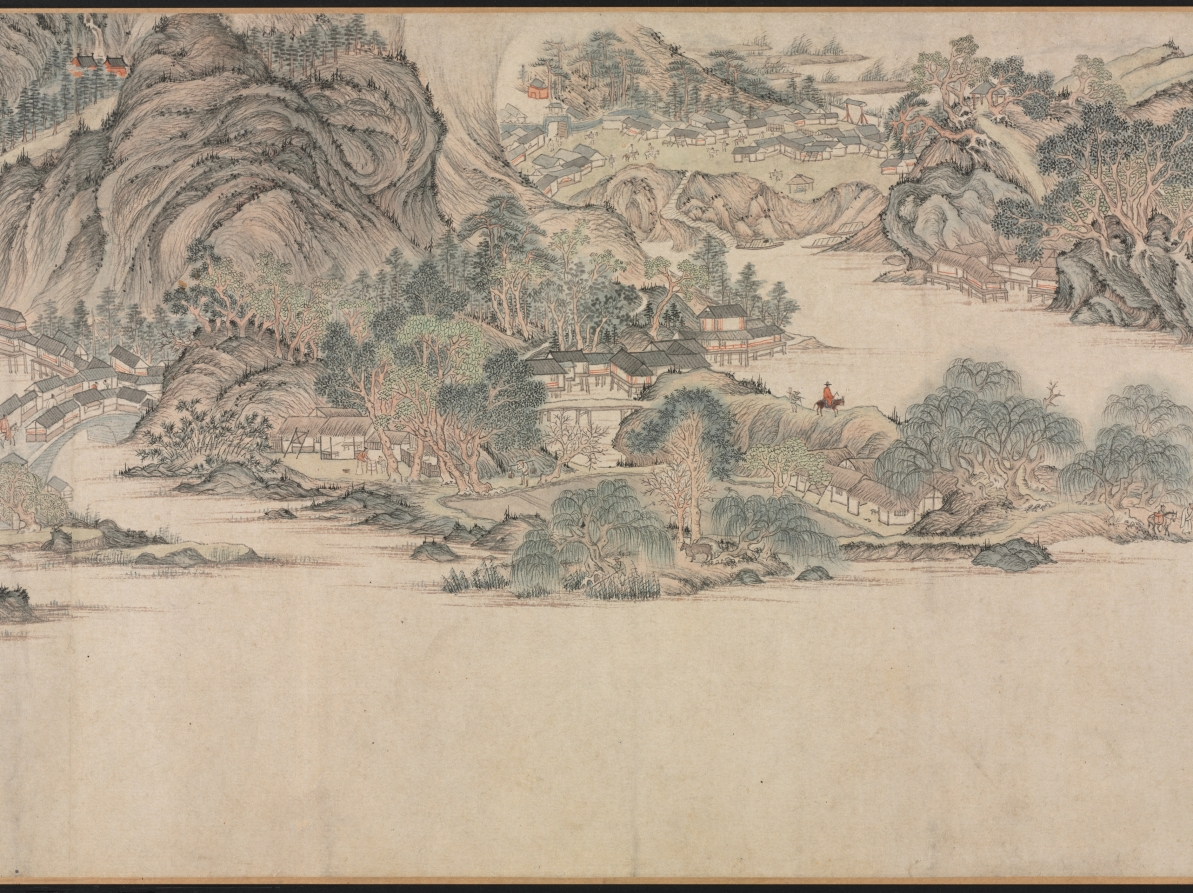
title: Greeting the Spring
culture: China, Ming dynasty (1368–1644)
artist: Wu Bin (Chinese, active c. 1591–1626)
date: 1600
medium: handscroll; ink and light color on paper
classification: Painting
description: This masterfully composed landscape in light colors and delicate brushwork is an image of the water-rich Jiangnan region in southeast China, where Wu Bin was active as an artist. Embedded in rolling hills along lakesides and streams nestle cityscapes hosting numerous spring festivities. Lantern displays and street performances in the villages salute the New Year, and are interwoven with scenes of farming, fishing, and silk making. In one scene in the middle ground, an ox made of clay under a canopy is lead in a procession to an architectural compound, a ceremony known as whipping the spring ox in hope for a good harvest. This handscroll bears five collector seals by the Qianlong emperor indicating his appreciation for the painting.